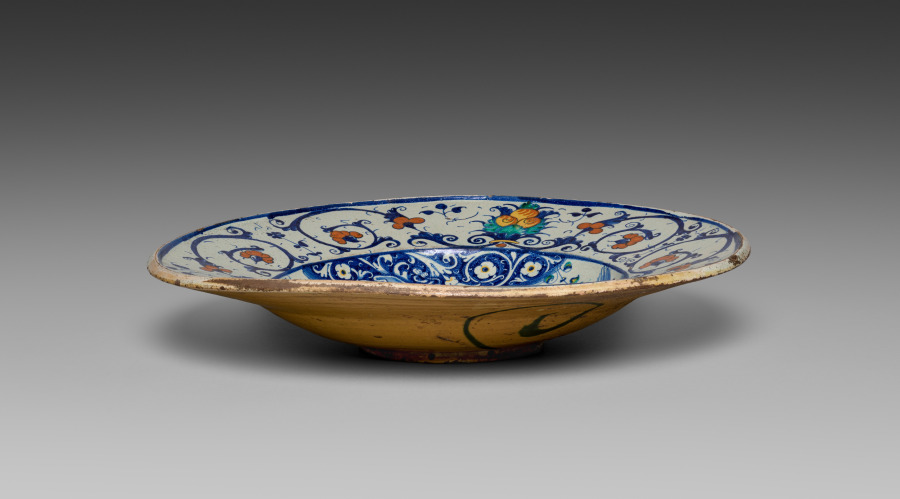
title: Bowl Depicting Saint Francis Receiving Stigmata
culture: Italy, Deruta, 16th century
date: 1531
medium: tin-glazed earthenware (maiolica)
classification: Ceramic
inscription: dated on reverse: "1531"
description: In this depiction representing his closeness to Christ, Saint Francis receives the stigmata through strikes of light from a vision of the risen Lord hovering as an angel in front of the basilica at Assisi. This bowl likely recalls a panel painting produced by the Italian master painter Giotto around 1300.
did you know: According to Christian tradition, the stigmata correspond to the appearance of Christ’s wounds at similar places on the faithful following his crucifixion.